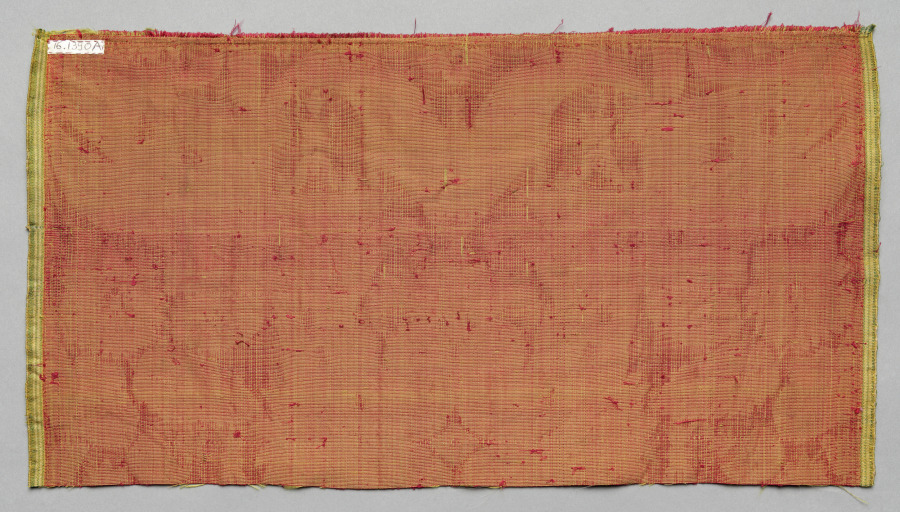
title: Velvet Fragment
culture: Italy, Genoa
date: 1600s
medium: velvet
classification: Velvet